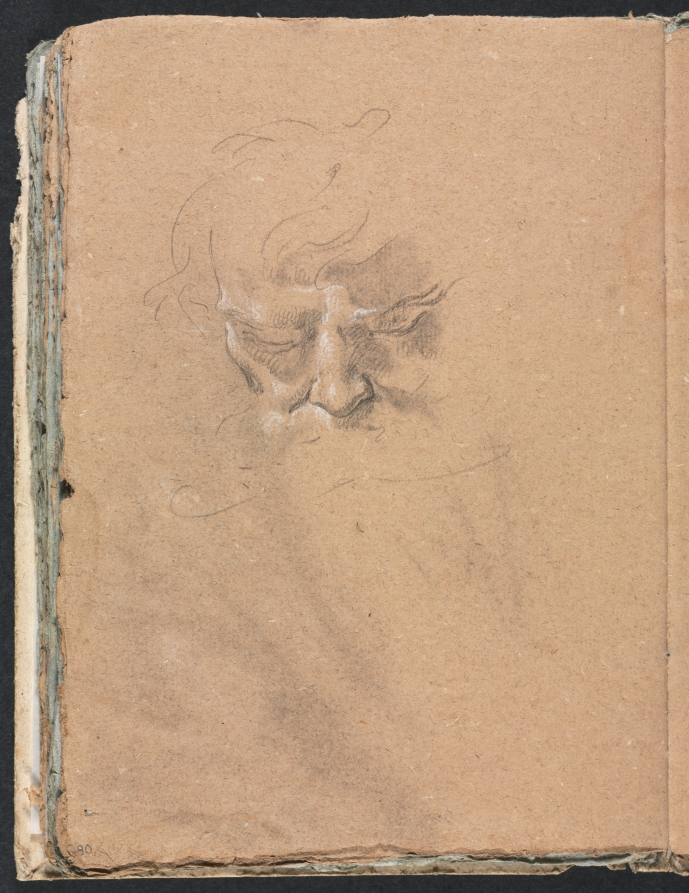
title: Verona Sketchbook: Male head (page 80)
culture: Italy, 18th century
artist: Francesco Lorenzi (Italian, 1723–1787)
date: 1760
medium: black chalk with white heightening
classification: Bound Volume